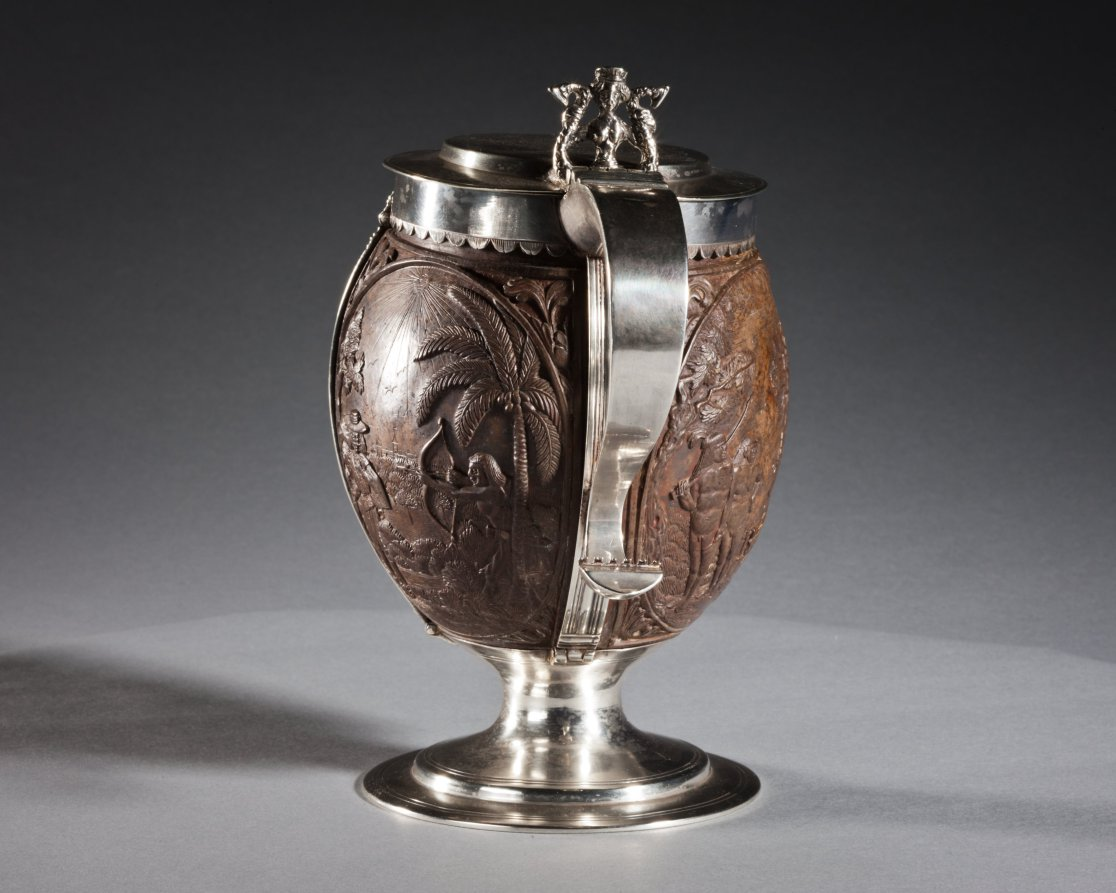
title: Coconut Cup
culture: carved coconut, probably The Netherlands; silver mount, probably England, 17th century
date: c. 1630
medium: carved coconut in silver mount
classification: Metalwork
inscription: top lid has engraved coat-of-arms, underside of lid has inscription: George Lewis TIVERTON Feby, 1st 1760.